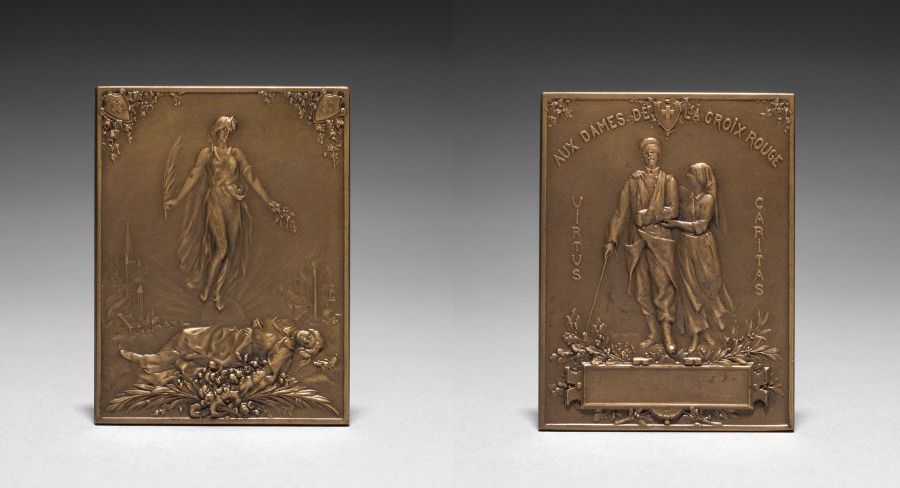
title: Medallion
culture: France, 19th-20th century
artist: Henri Emile Allouard (French, 1844–1929)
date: 1916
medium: bronze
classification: Metalwork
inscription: "Aux dames de la Croix rouge. Virtus Caritas."